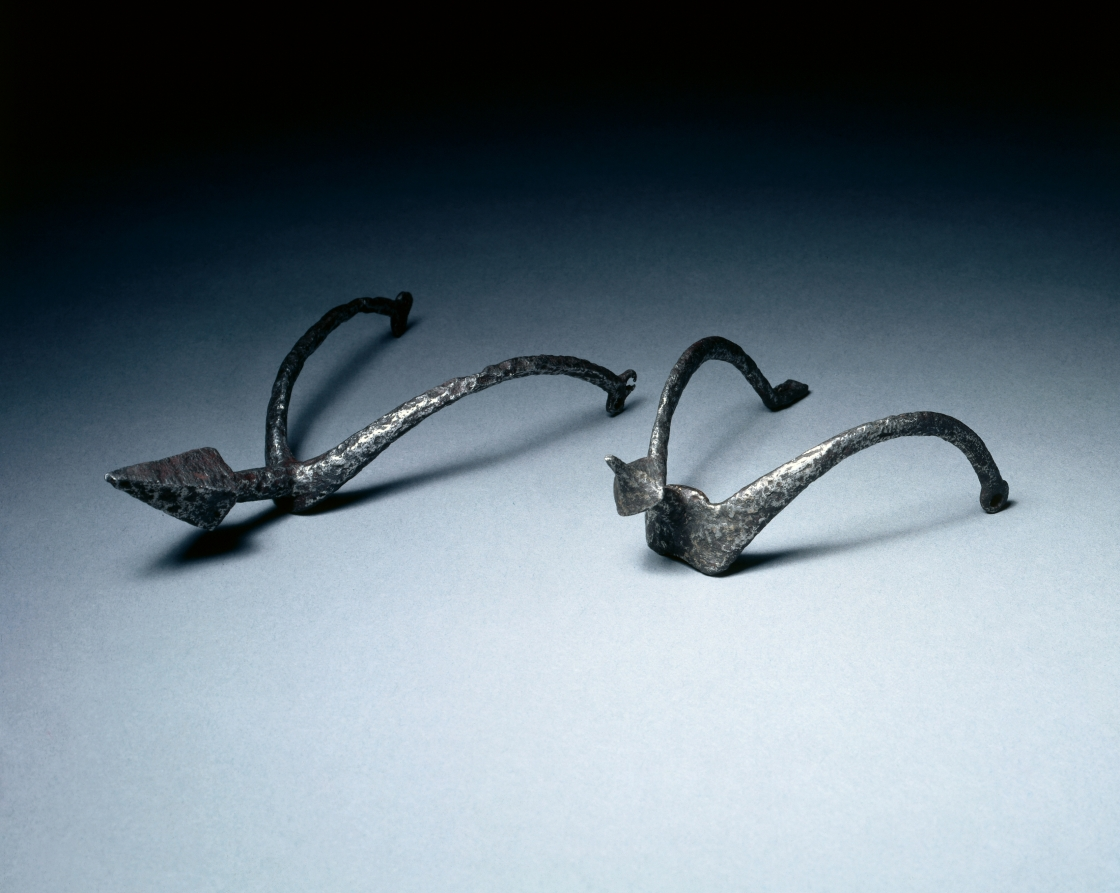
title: Pricked Spur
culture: Spain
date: 1200s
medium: steel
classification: Arms and Armor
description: The spur was an essential part of the knight's equipment. Fastened to his heels by means of straps and buckles, it was used to prod a horse into action. This example represents the oldest type recorded, the "pricked" spur, so-called because its neck terminated in a spike. The pricked spur was replaced during the Middle Ages by the "rowel" spur, with a rotating spiked wheel.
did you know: A knight’s status was closely related to his horse; as a result spurs became a symbol of chivalry and could be given as a token during a knighting.